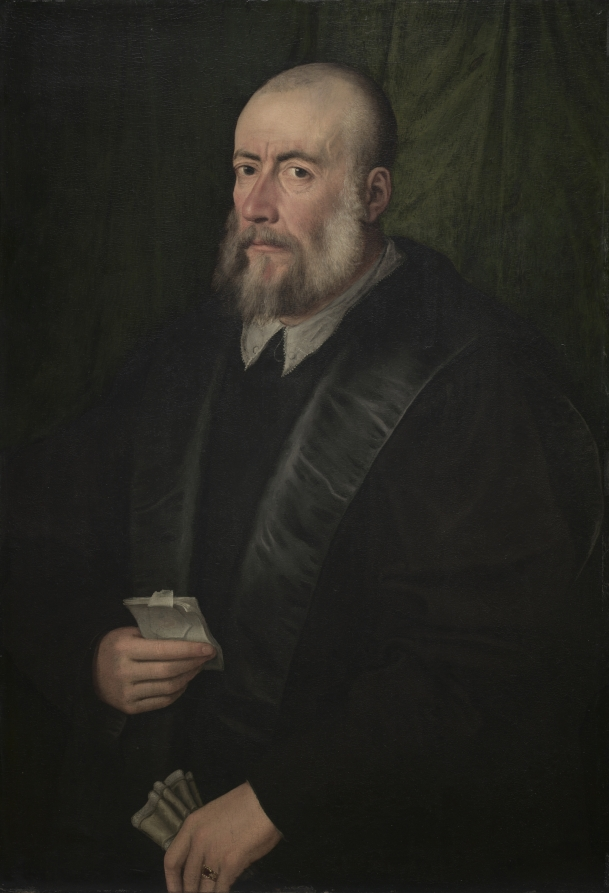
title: Portrait of an Old Man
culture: Italy, 16th century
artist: attributed to Giulio Campi (Italian, c. 1500–1572)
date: mid-1500s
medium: oil on wood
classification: Painting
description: Part of a distinguished family of Northern northern Italian painters, Campi depicts his sitter with an unidealized face dominated by carefully observed wrinkles. He stares out intently while grasping what may be a letter with its paper seal broken in his right hand. Despite this intense gaze the figure does not establish a lively connection with the viewer, and his mood remains distant and reserved, in keeping with Renaissance ideas about elegant comportment. Though his costume appears plain, the sumptuous black fabric was indicative of high status in some parts of Europe. --Michele Frederick (December 2011)